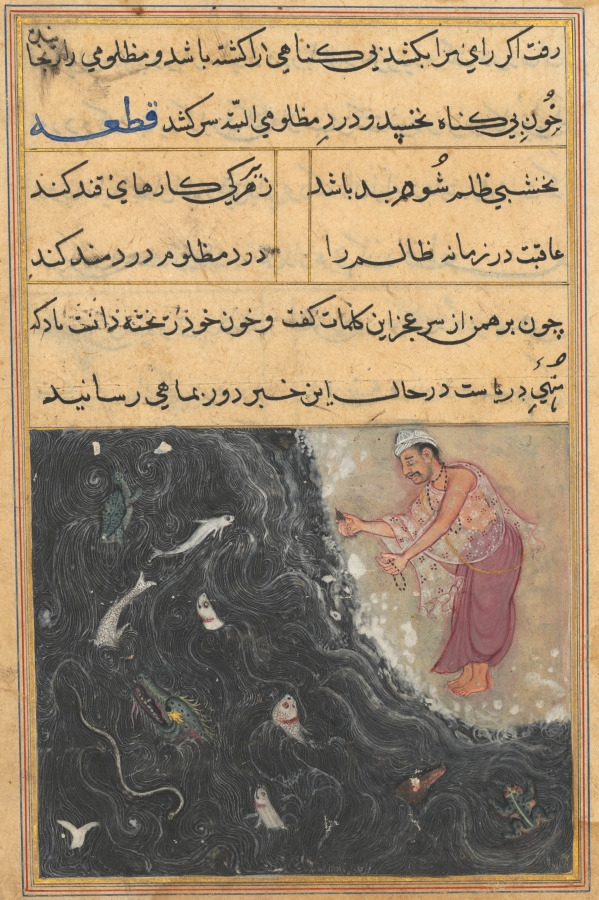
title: The Brahman’s predicament is conveyed by the wind to the fish who carries the news to the king of the Ocean, from a Tuti-nama (Tales of a Parrot): Eleventh Night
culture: Mughal India, court of Akbar (reigned 1556–1605)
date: c. 1560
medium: gum tempera, ink, and gold on paper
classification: Painting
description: A Brahman stands on a sandy beach prayerfully calling out for help to send a message to the king of the ocean. His own raja (sovereign) had sent him on pain of death to bring the king of the ocean to the Raja’s son’s wedding in three days. In the text, the wind brings the Brahman’s message to the ocean, and the fish, hearing it, take the news of the wedding invitation to their king. The swirling eddies and foamy shore suggest the presence of wind. Besides fish, a crocodile, sea snake, frog, and turtle also heed the message.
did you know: On the Brahman's arm is written "Ram Ra[m]," indicating that he is a devotee of Rama, avatar of Vishnu.